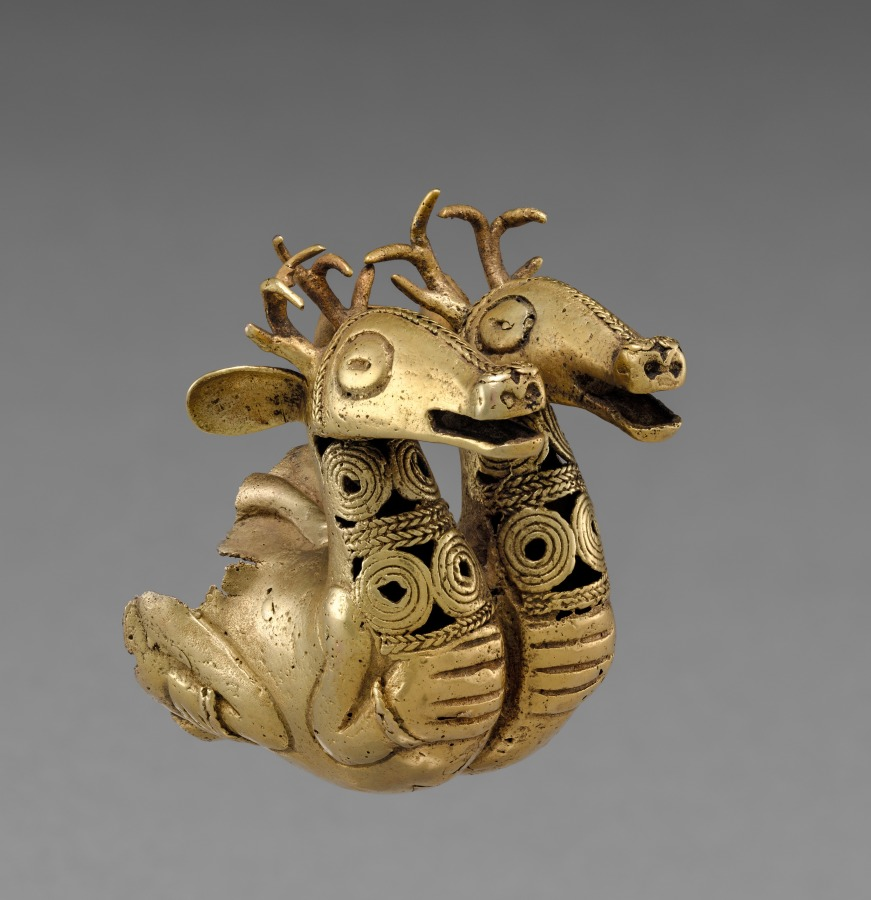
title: Finial with Two Deer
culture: Isthmian Region (Colombia), Sinú (Zenú), 5th century-11th century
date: 400–1000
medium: gold, cast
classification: Metalwork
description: Unique to Colombia's Sinú region are gold finials with sculptural images at right angles to thimble-like caps; the caps fit over the end of a staff, an emblem of rank that may have been held horizontally. This impressive finial features two deer (or a single creature with two deer heads) that hold human-like hands over their chests. Sinú animal imagery is understudied but may relate to beliefs about the cosmos. For instance, contemporary natives attribute importance to birds because they have the capacity to move among different environments (air, land, water); they may have been regarded as mediators among levels of the cosmos.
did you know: This exquisite finial was made using the lost-wax casting process.